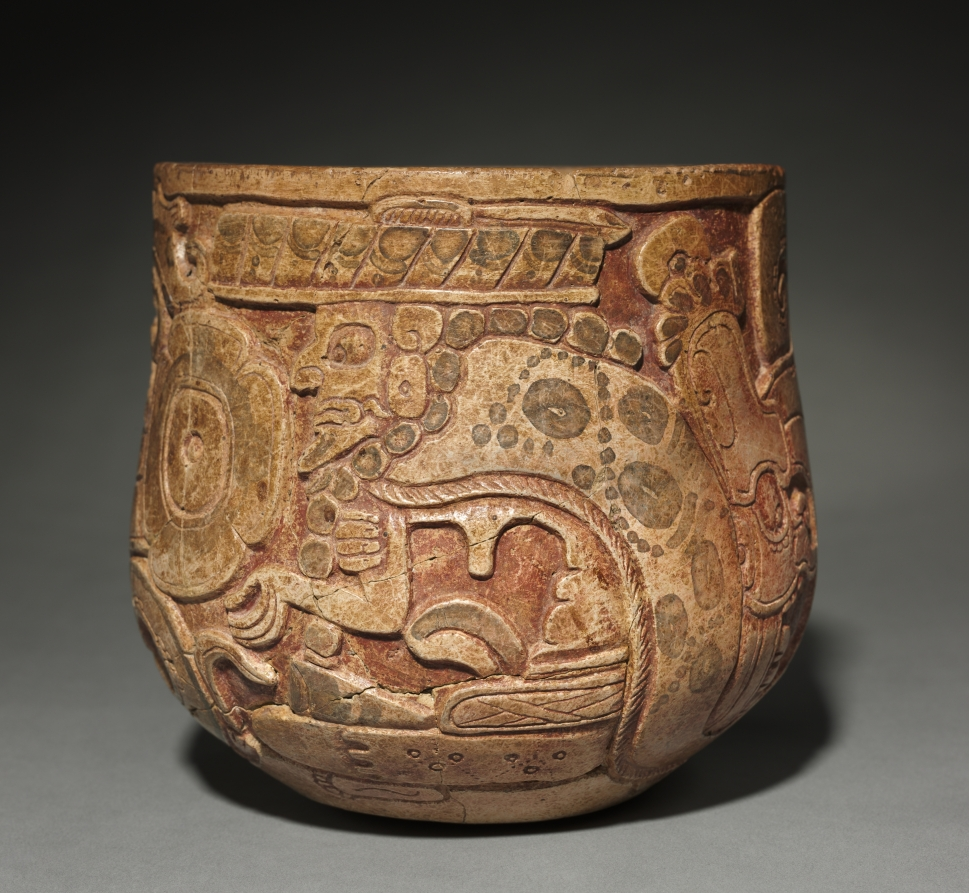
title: Carvel Vessel with an Underworld Diety (God L)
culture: Mexico, Yucatán Peninsula, Maya (Chocholá) style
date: 600–900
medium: earthenware, slip, pigment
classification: Ceramic